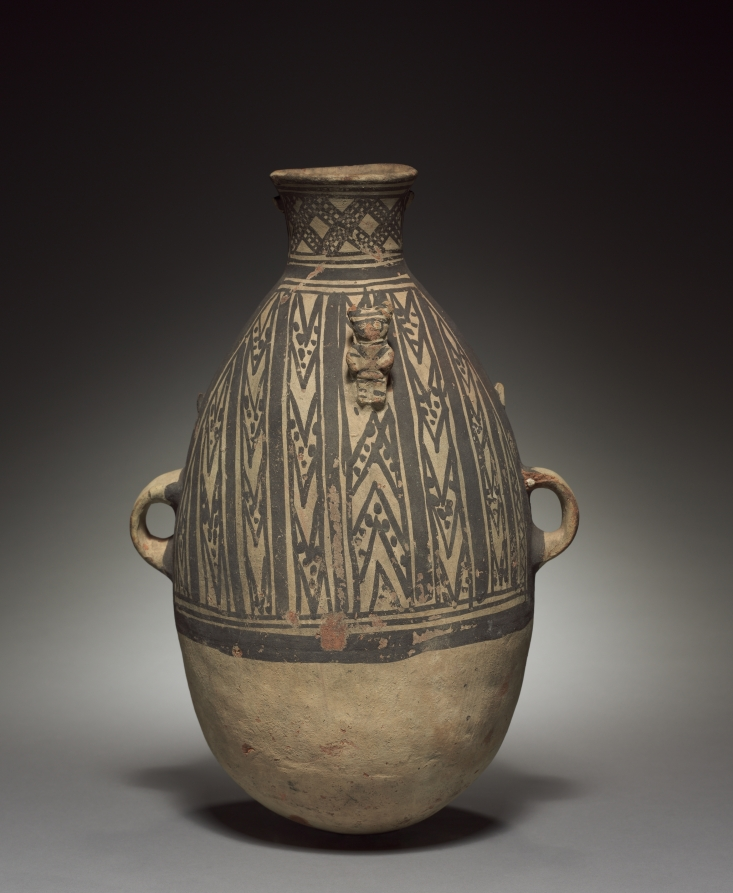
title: Bottle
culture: Peru, Chimú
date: 800–1500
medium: pottery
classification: Ceramic